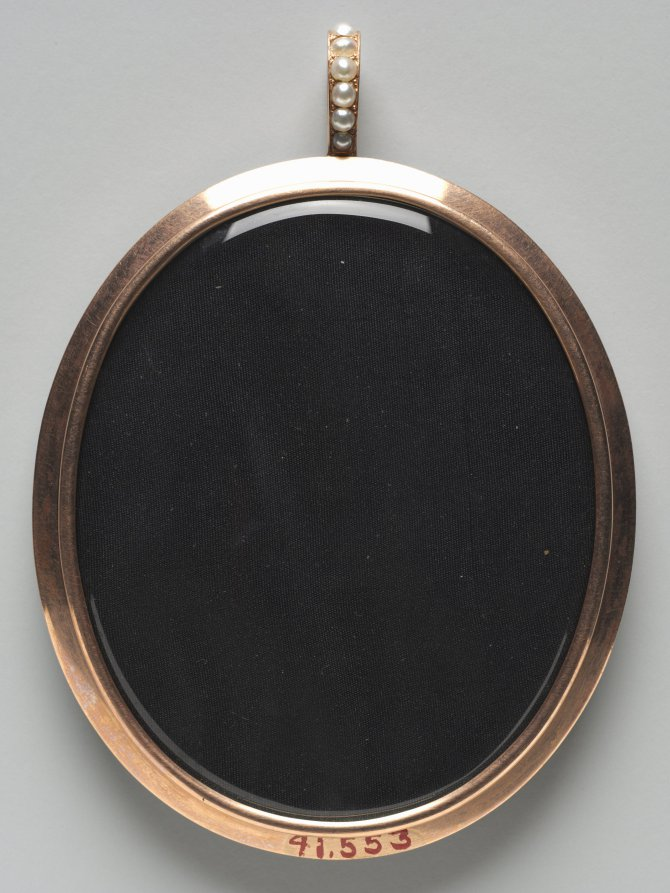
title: Portrait of Mary Frances (Fanny) Swinburne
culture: England, 18th century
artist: Richard Cosway (British, 1742–1821)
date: c. 1786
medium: watercolor on ivory in a gold, enamel, and split pearl frame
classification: Portrait Miniature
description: Mary Frances (Fanny) Swinburne (d. 1828) was the eldest daughter of the travel writer Henry Swinburne. This portrait was painted around 1786, when Richard Cosway was reaching the mature stage of his career and was among the most sought after miniature painters in London. In this work the sitter’s hair is adorned with pearls—a style commonly seen in portraits of the period. She wears an earring in her right ear. Her bright blue eyes, rosy cheeks, and red lips are accentuated by her mass of curled, powdered hair and her pale skin and gown. This work is a classic example of Cosway’s elegant female portraits, exhibiting the nearly monochromatic palette and free style that would be so decisively rejected in the next century by such artists as Andrew Robertson (1777–1845) and William Charles Ross (1794–1860). The miniature is placed in a twentieth-century revival period gold and blue enamel frame with graduated split pearls. This ornate type of frame was especially popular among early-twentieth-century collectors who felt that it suited the grandeur of miniatures by Cosway and his circle, the female portraits of which were so often composed of the pale tones of gauzy dresses, blue skies, and pearl-ornamented hair.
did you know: Richard Cosway painted Mary Frances’s parents, Henry and Martha, in the same year he painted this.